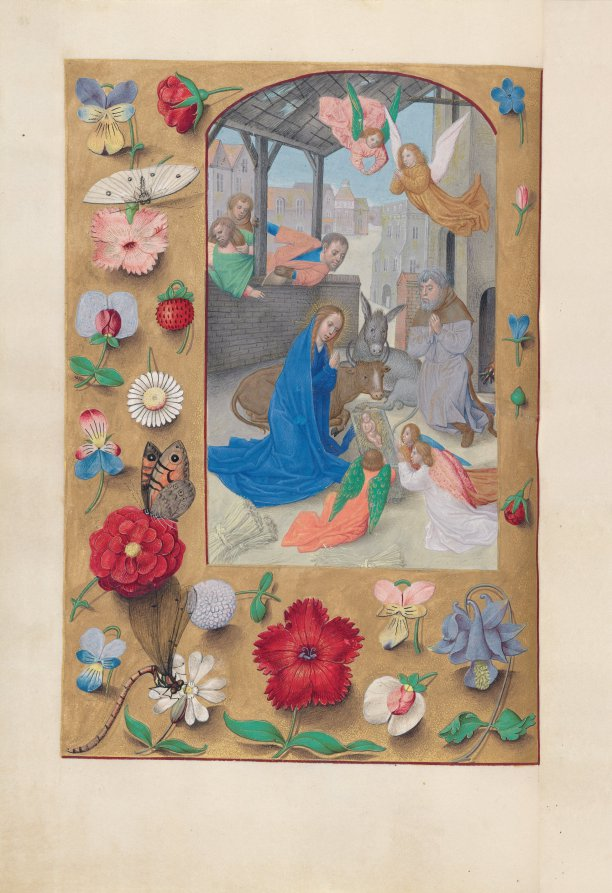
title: Hours of Queen Isabella the Catholic, Queen of Spain: Fol. 126v, Nativity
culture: Flanders, Ghent and Bruges, late 15th century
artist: Master of the First Prayerbook of Maximillian (Flemish, c. 1444–1519)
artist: and Associates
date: c. 1500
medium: ink, tempera, and gold on vellum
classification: Bound Volume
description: This manuscript was illuminated by a circle of at least five highly organized manuscript painters active in the Flemish cities of Ghent and Bruges. The principal illuminator was Alexander Bening, who painted the majority of the book's miniatures. Manuscripts produced by this circle of artists are renowned for the decoration of their borders, which typically feature a rich variety of realistically-painted flowers, birds, and butterflies. This prayer book, called a book of hours, was intended not for a cleric, but for the private devotions of a lay person-in this case, Isabella the Catholic, Queen of Spain (1451-1504). Isabella's coat of arms embellishes the book's frontispiece. It is unlikely that the book was commissioned by the Queen herself; rather, she probably received it as a diplomatic gift from someone courting her patronage, perhaps Cardinal Francisco Jimenez de Cisneros. A Franciscan friar, Jimenez was dependent upon Isabella for his advancement, first to the post of Queen's confessor in 1492, and then to Archbishop of Toledo in 1495.